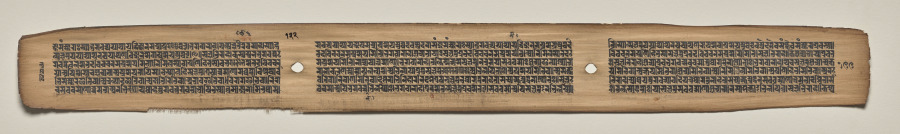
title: Text, Folio 122 (verso), from a Manuscript of the Perfection of Wisdom in Eight Thousand Lines (Ashtasahasrika Prajnaparamita-sutra)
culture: Eastern India, Bihar, Vikramashila Monastery. Painting: Nepal, Kathmandu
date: Sunday, September 14, 1119 (year 239 of the Newar Samvat in the month of Ashvina)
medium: gum tempera and ink on palm leaves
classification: Painting